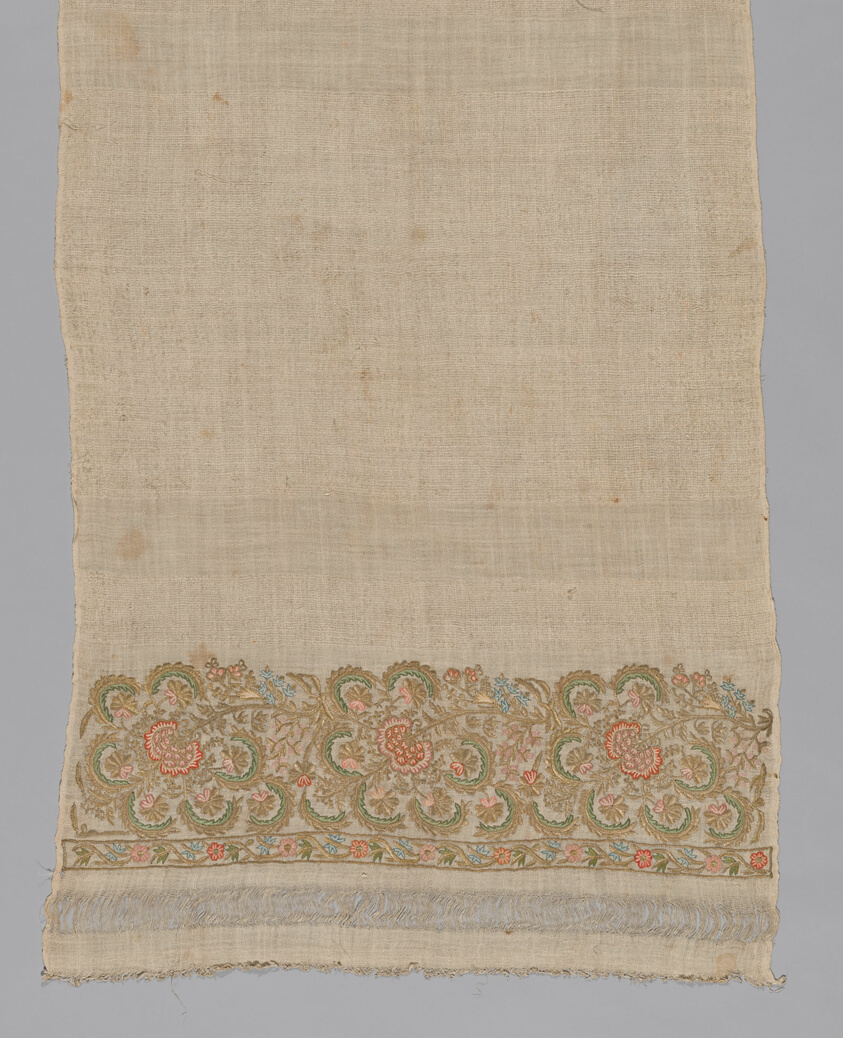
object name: Textile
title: Towel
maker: Turkey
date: 19th century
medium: embroidered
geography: Turkey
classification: textile; needlework (visual works); weaving